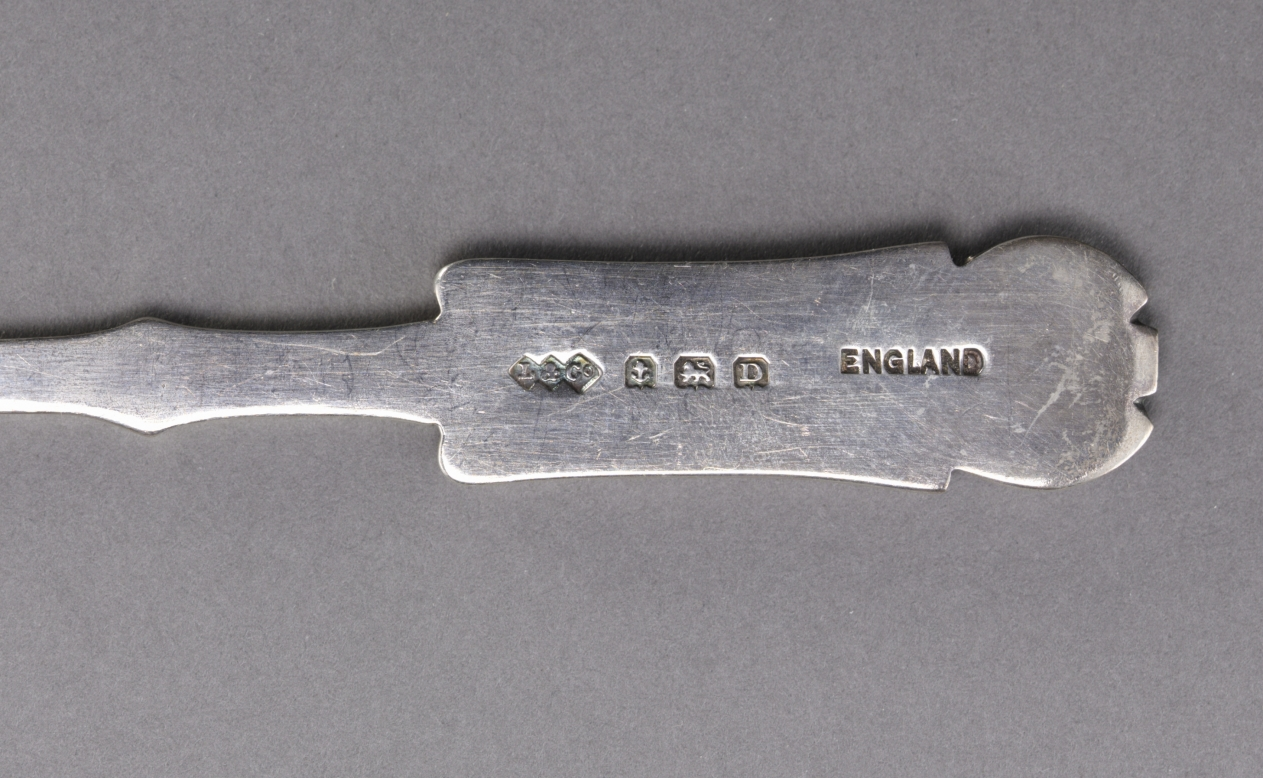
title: Set of six Coffee Spoons in Original Wooden Case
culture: England, London, 19th century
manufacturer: Liberty and Company (British)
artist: attributed to Oliver Baker (British, 1856–1939)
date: 1905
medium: Silver, turquoise, wooden box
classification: Silver